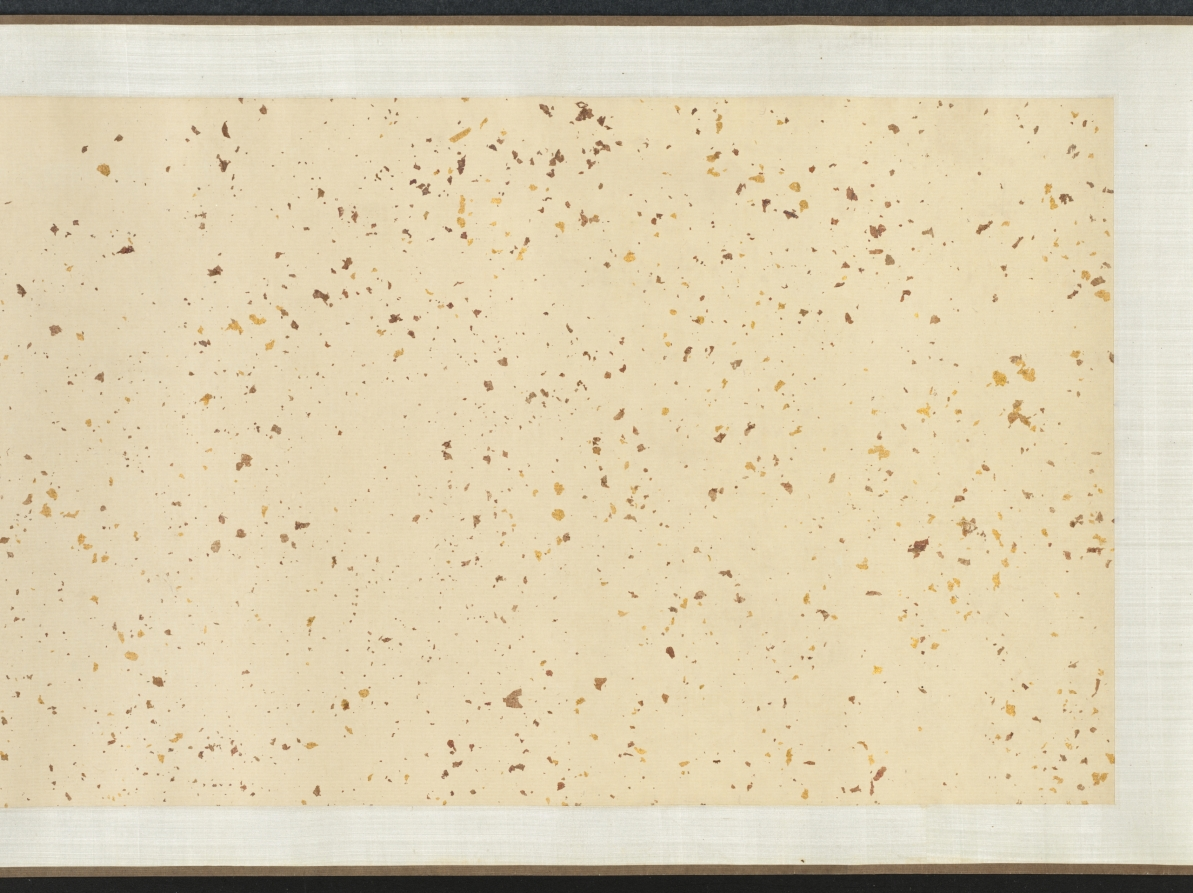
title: Ink Flowers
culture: China, Yuan dynasty (1271-1368)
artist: Zhao Zhong (Chinese, second half of the 1300s)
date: 1361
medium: Handscroll; ink on paper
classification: Painting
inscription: 寶帶同心結，香羅合歡扇。/ 繡作錦鴛鴦，雙雙為君獻。/ 薔薇露灑熏籠衣，馨香奉君君勿違。 原初并題。 [印] 趙衷原初畫記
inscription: 翠袂素羅韈，玉臺黃金盃。浩歌渡弱水。天風卷海三山開，麻姑方平為招飲，蛟宮獻舞銀濤堆。 原初并題。 [印] 雲林清趣、[印] 趙衷原初畫記。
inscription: 右用湯叔雅慶元中所寫墨花法作此卷，又效李長吉體賦詩以題之。詩與畫雖未工，要皆出於古人之餘，譬猶欲成方圓而必求其規矩之用也，識者毋誚焉！至正辛丑八月望日，東吳野人趙衷原初謹識。 [印] 趙原初、[印] 傳世清玩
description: Zhao Zhong's flowers, each paired with a poem, echo the fine-style colored flowers of the academic tradition, but instead he used only ink. Fine lines define the contours of each plant, as well as the veins within each petal and leaf. Careful ink washes give subtle modeling to the forms. The combination of lily, narcissus, and peony is unusual as the three belong to no known seasonal or symbolic system popular in the fourteenth century. Zhao’s medical training may have influenced the selection. Powdered lilies, for example, were prescribed to dispel grief, while the bark of tree peony roots was used as a treatment for various blood disorders.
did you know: This handscroll is a very rare example of ink flowers in the linear baimiao style of the fourteenth century.